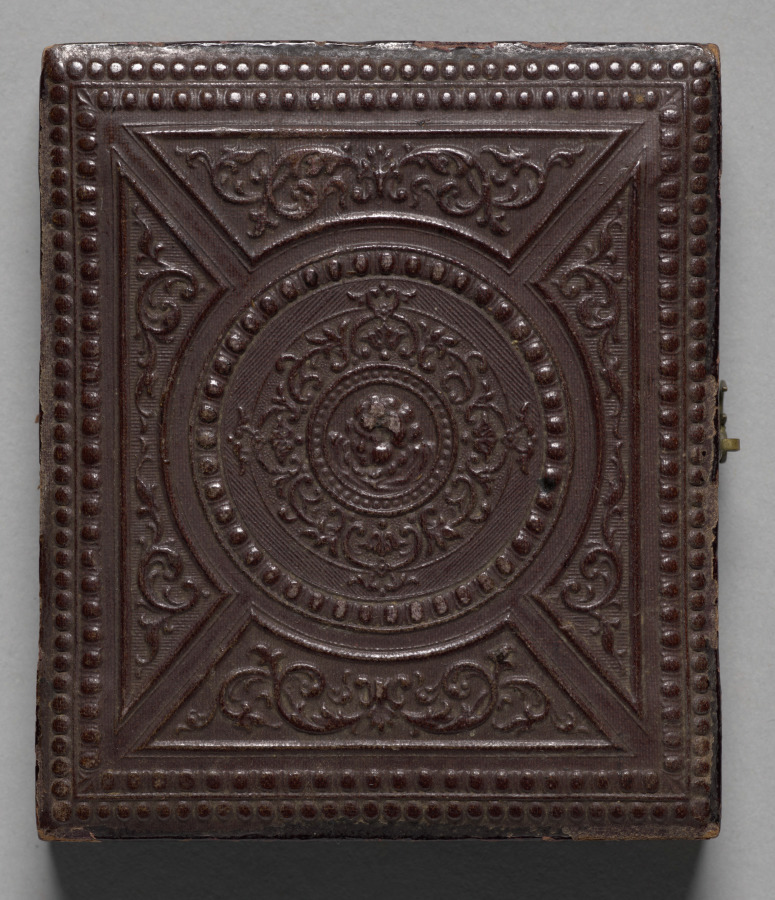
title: Teenage girl with bottle curls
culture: America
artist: Rufus Anson (American, 1820–1900)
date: c. 1855–60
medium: daguerreotype, sixth plate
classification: Photograph